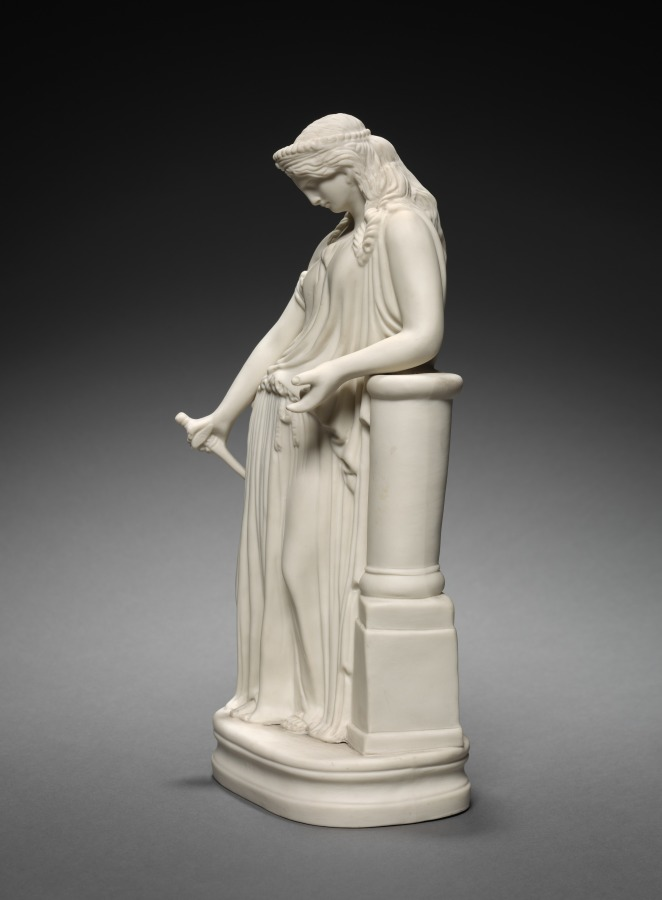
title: Figure of Medea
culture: England, 19th century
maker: W. T. Copeland & Sons (British)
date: c. 1870–1890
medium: Parian porcelain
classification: Ceramic